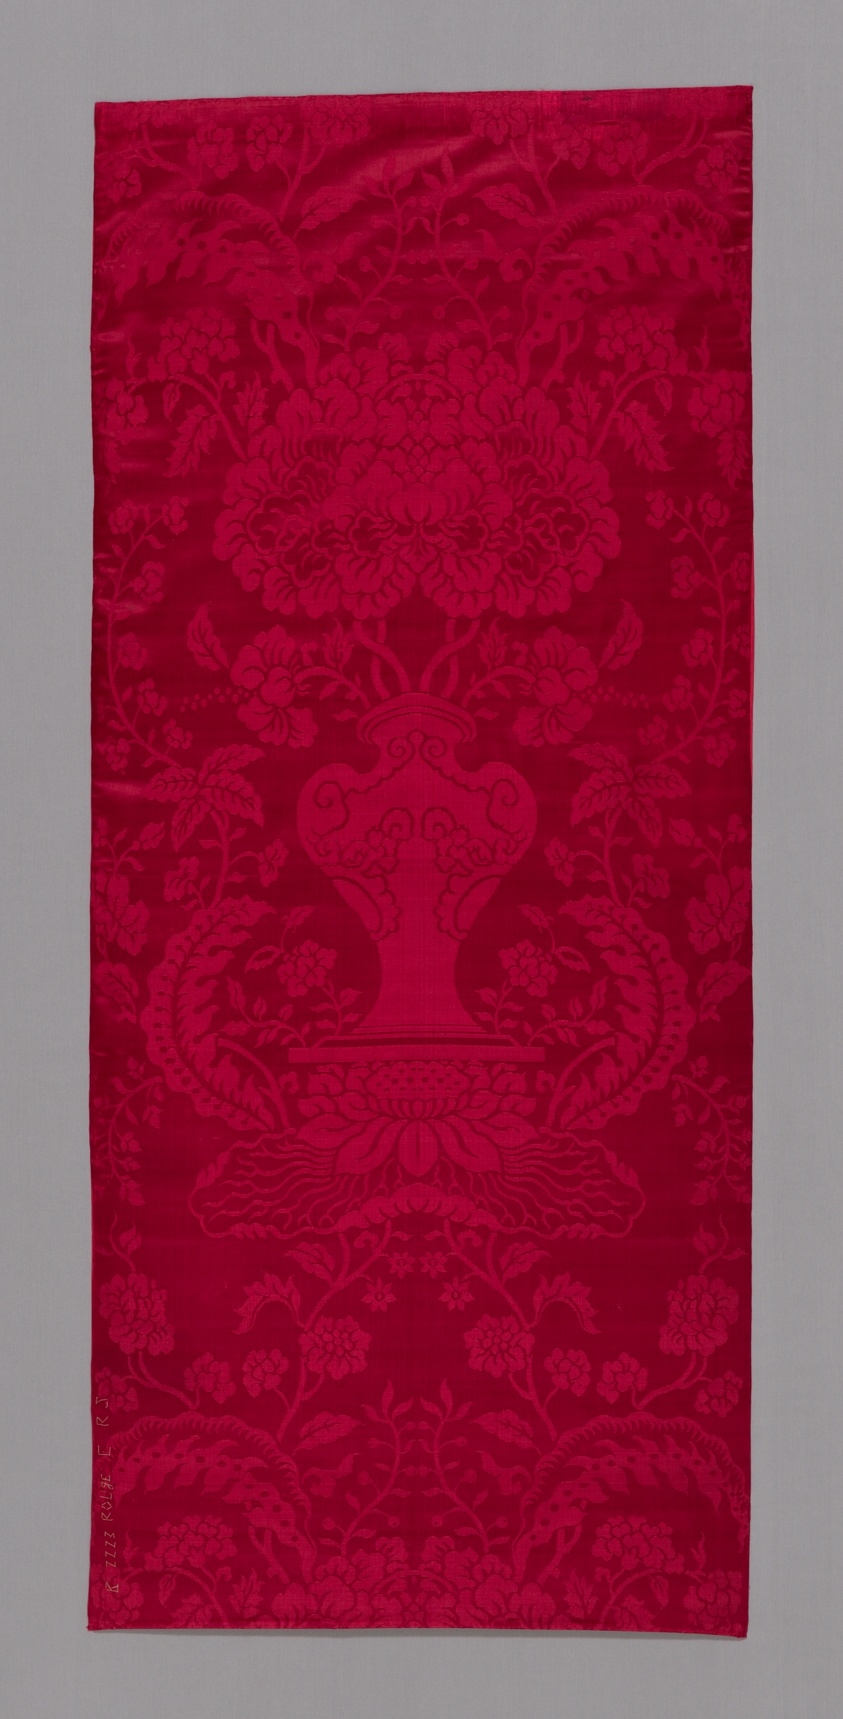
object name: Textile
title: Panel (Furnishing Fabric)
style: qing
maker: China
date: Qing dynasty (1644–1911), c. 1700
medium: Silk, 7:1 satin damask weave; inscription embroidered with cotton in back and straight stitches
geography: China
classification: textile; weaving; furnishing textile